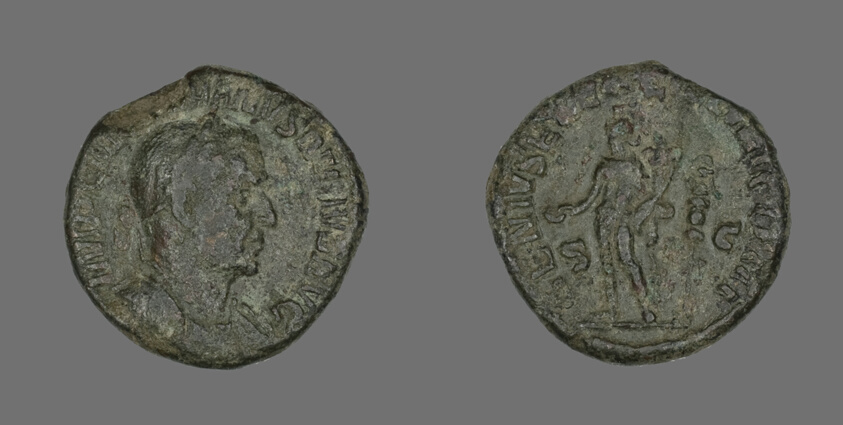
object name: Coin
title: Coin Portraying Emperor Aurelian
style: imperial (roman), ancient, roman (ancient, style or period)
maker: Roman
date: 270-275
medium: Bronze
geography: Roman Empire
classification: coin; struck; ancient art